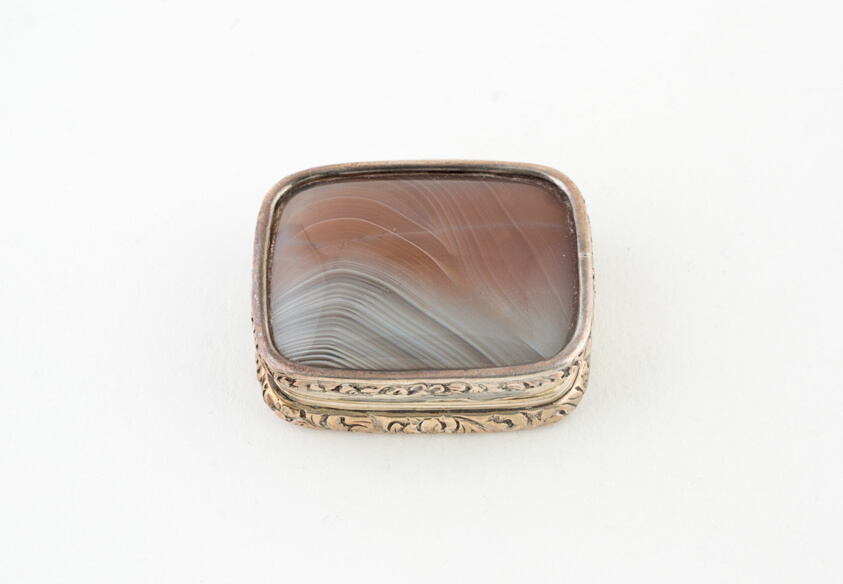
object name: Metalwork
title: Vinaigrette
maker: Marked IE; Possibly Birmingham, England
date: c. 1840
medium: Silver, silver gilt, and agate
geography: Birmingham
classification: vinaigrette (container for health care); container for personal use; box; european decorative arts; metalwork; silver; decorative object/ornament